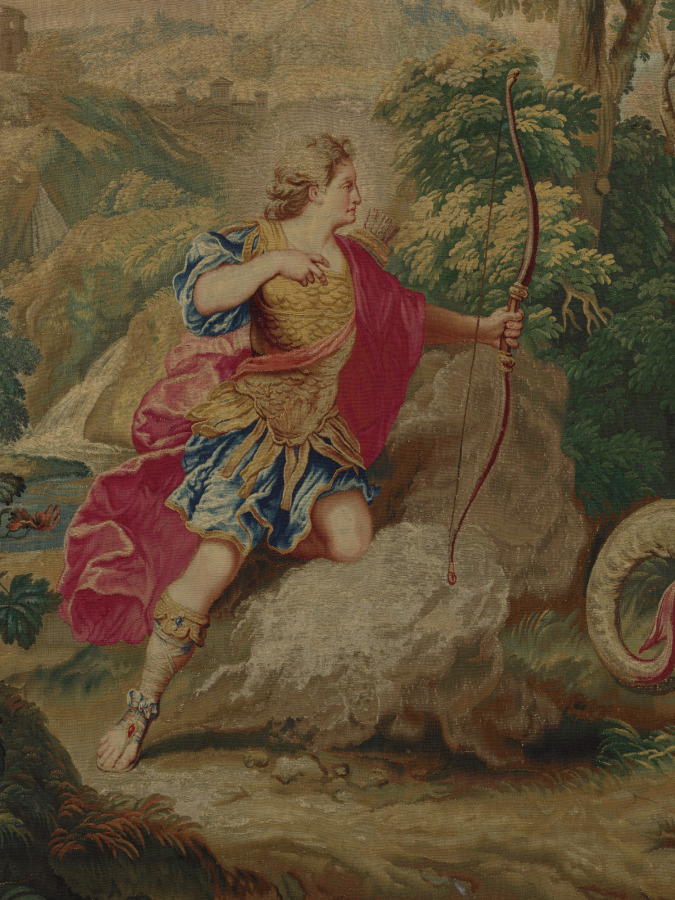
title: Apollo and the Serpent Python (from Set of Ovid's Metamorphoses)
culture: France, 18th century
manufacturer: Gobelins Manufactory (France, Paris, est. 1662)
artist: after Nicolas Bertin (French, 1668–1736)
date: 1700–1730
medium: tapestry weave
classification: Tapestry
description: Apollo’s dynamic posture with his right arm pulled back and his left holding a bow indicates that he has just shot the arrow piercing the snarling serpent’s throat and body. Apollo’s triumph over powerful Python, the fearsome serpent offspring of Mother Earth or Gaia, boosted his ego tremendously, leading to his tragically unsuccessful pursuit of Daphne. The regally dressed hunter and his prey are seen alone in an environment teeming with natural life that includes a pumpkin patch. In the creation of this textile, the manufacturer used blue and yellow dye to create the color green which has since degraded, causing the pumpkins and their leaves to appear blue.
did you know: During the French Revolution, Gobelins tapestries were sometimes disassembled to harvest the gold threads.